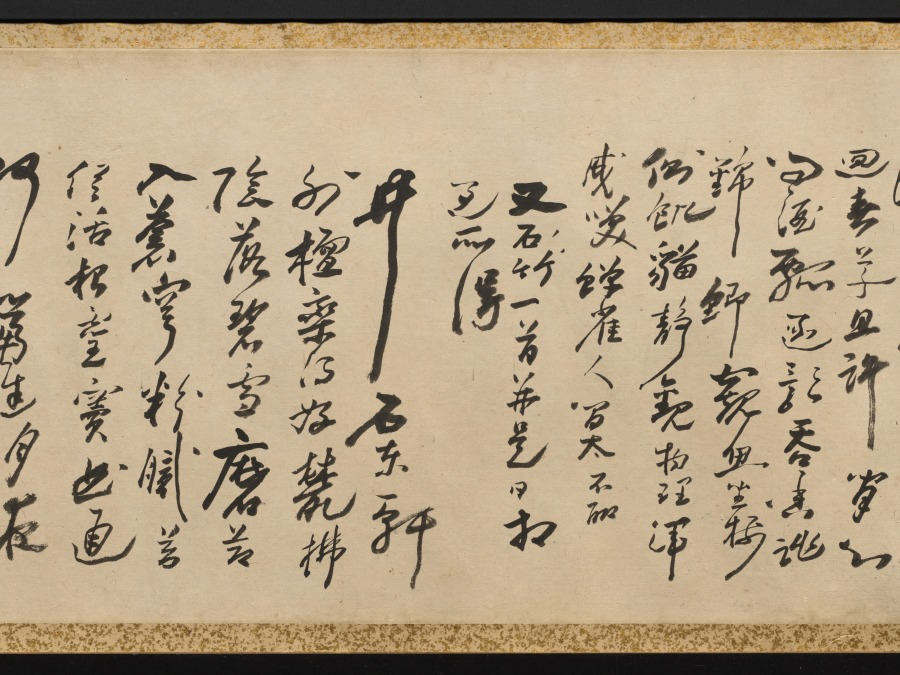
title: Plum Blossoms and Peonies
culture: China, Qing dynasty (1644-1911)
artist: Gao Fenghan (Chinese, 1683–1749)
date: 1741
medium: handscroll, ink on paper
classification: Painting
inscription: Artist's 2 inscriptions and 9 seals (the painting of Peonies with the artist's colophon and the colophon by Hou Chia-fan are on a single sheet of paper). Artist's inscription and 2 seals (Plum Blossoms): [seal] Ts'ai-yün. After finishing writing my colophon, I unrolled the painting to take another look, and it now seems that the composition here should have moved to the later part of the scroll. If that is the case, then the "Cool Beauty" [prunus] of the Solitary Hill is after all unable to take precedence over the "King of Flowers" [peony]. A laugh. Lao-fou inscribed. [seal] Feng-han. Artist's colophon (Plum Blossoms): [3 seals] Tun; Yen-yün-kung-yang, Hou-shang-tso-sheng. A few days after I painted this scroll for Shui- hsien [Yüeh Meng-yüan], the plum blossoms were in full bloom at his residence. He invited me over to enjoy them together for a long while, and I composed two additional poems and wrote them down here for his criticism. [Poems on the colophon are not translated.] First month, twenty-first day, your junior, Kao Feng-han of Nan-fou drafted this with the left hand. [seal] Feng-han. Artist's inscription and 4 seals (Peonies): Brushed with the left hand in the hsin-yu year [1741]. [seal] Yu-hsi. [3 seals at end of painting] Hou-shang-tso-sheng; Yen-yün-kung-yang; Shih-tsao-wu. Artist's colophon and seal (Peonies): The imperial concubine from the Yang family loved to dress in red, And from the emperor won the title of Hai-t'ang. But ever since she became the new dream of the moon palace, She changed into rainbow colors, while learning to dance. After I wrote the poem on Looking for Plum Blossoms in the Teng-wei Mountains, I attached to it a few branches of prunus, some bamboo tips and a piece of rock, with a scattering of green [moss] here and there to fill up the scroll. Unexpectedly, my playful fascination [with these subjects] was still not quite satisfied, so I made up these amorous ideas and romantic images [of the peony], to follow the footsteps of the fair lady of the Ku-hsieh Mountain [prunus]. Furthermore, I picked out one poem to be my vanguard. Perhaps such luminosity of wealth and power will be enough to overwhelm the poor fellows, and [they] will not mind the comparatively short length [of paper] assigned to it. Amusingly inscribed. Please correct me again. To Shui-hsien, my learned senior, your junior Han inscribed again. [seal] Tso-hua [left-handed painting]. 1 additional colophon and 5 additional seals: 1 colophon, dated 1742, and 3 seals of Hou Chia-fan (act. ca. 1742); 1 seal of P'u Ch'üan (20th c.?); 1 seal of Li family (dates unknown).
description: One of the so-called Yangzhou Eccentrics (a group of painters who lived in Yangzhou and were known for their unorthodox art and lifestyle), Gao Fenghan depicts China’s two most loved flowers in full bloom—the “cold beauty,” or plum blossom, in the first section, and the “king of flowers,” or peony, in the second section. Painted in 1741, the year when Gao decided to leave the south and return home to Shandong province in eastern China, this work was likely a token of farewell. His casual brushwork may indicate his mental and physical struggle at the time. After having crippled his right hand in 1737, Gao used his left hand to paint and achieved a crudeness and eccentric style unattainable before.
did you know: In East Asian art, peonies traditionally symbolize prosperity and wealth.